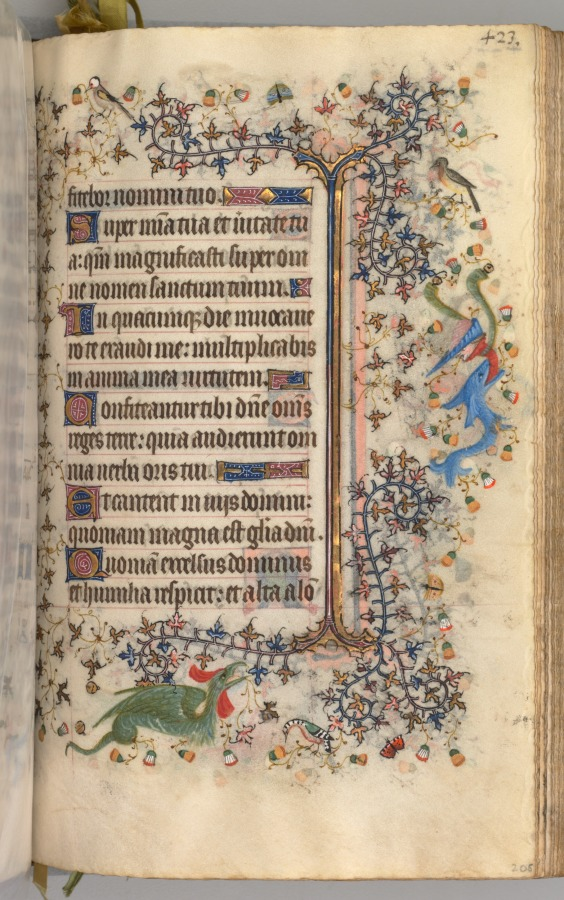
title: Hours of Charles the Noble, King of Navarre (1361-1425): fol. 206r, Text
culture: France, Paris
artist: Master of the Brussels Initials and Associates (French)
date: c. 1405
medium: ink, tempera, and gold on vellum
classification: Bound Volume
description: This precious volume was obviously highly prized by its owner, the French-born King of Navarre, who had his coat of arms painted on no less than twenty folios. Rather than directly commissioning this manuscript from a specific workshop, it seems that Charles the Noble acquired his book of hours -- perhaps ready-made for the luxury market -- while on a trip to Paris in 1404-05. A collaborative effort, six painting styles are evidenced within the pages of this codex, those of two Italians, two Frenchmen, and two Netherlanders. The painter who was responsible for the planning and decoration of the book, and who produced seventeen of the large miniatures, was a Bolognese artist known as the Master of the Brussels Initials. His principal assistant, responsible for most of the borders, was a Florentine who signed his name "Zecho" da Firenze on folio 208 verso.